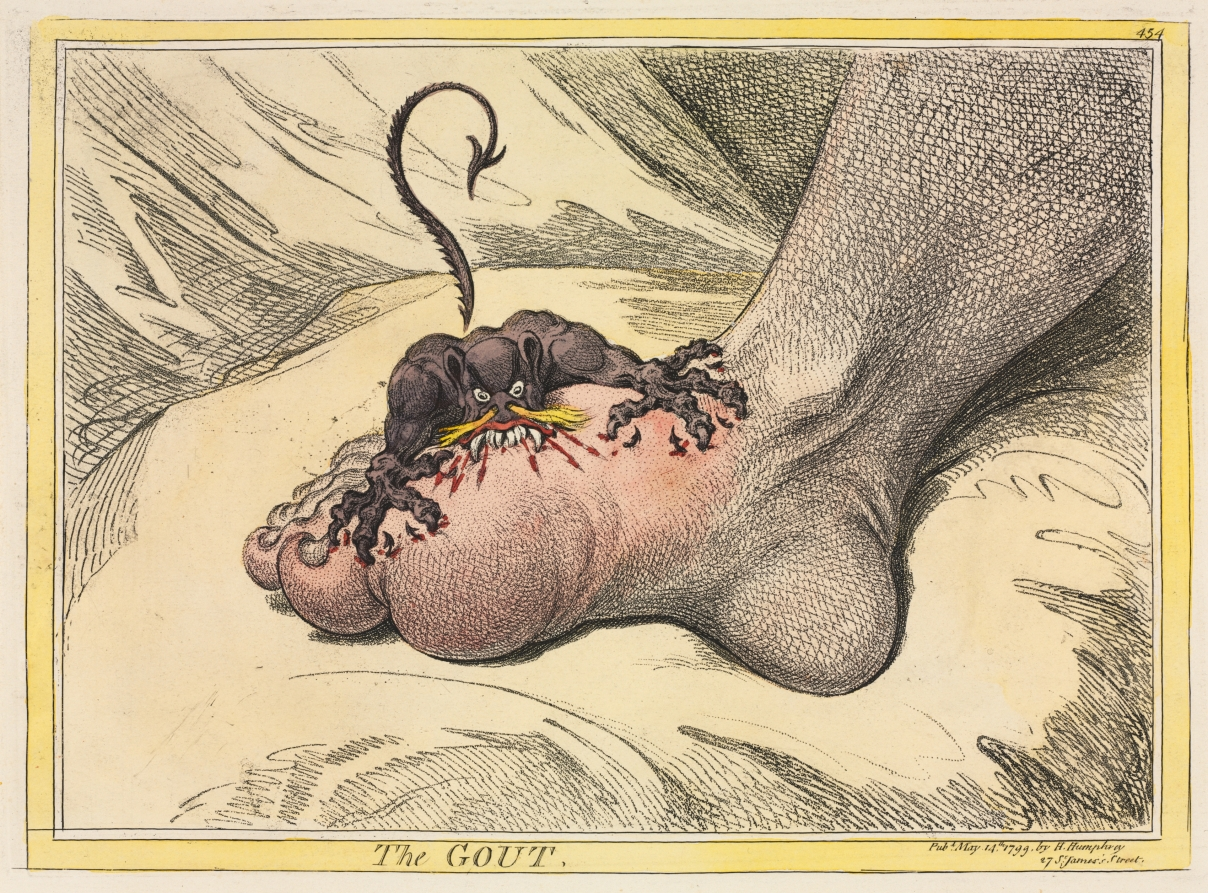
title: The Gout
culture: England, 18th century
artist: James Gillray (British, 1757–1815)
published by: Hannah Humphrey (c. 1745–1818)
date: 1799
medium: etching hand-colored with watercolor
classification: Print